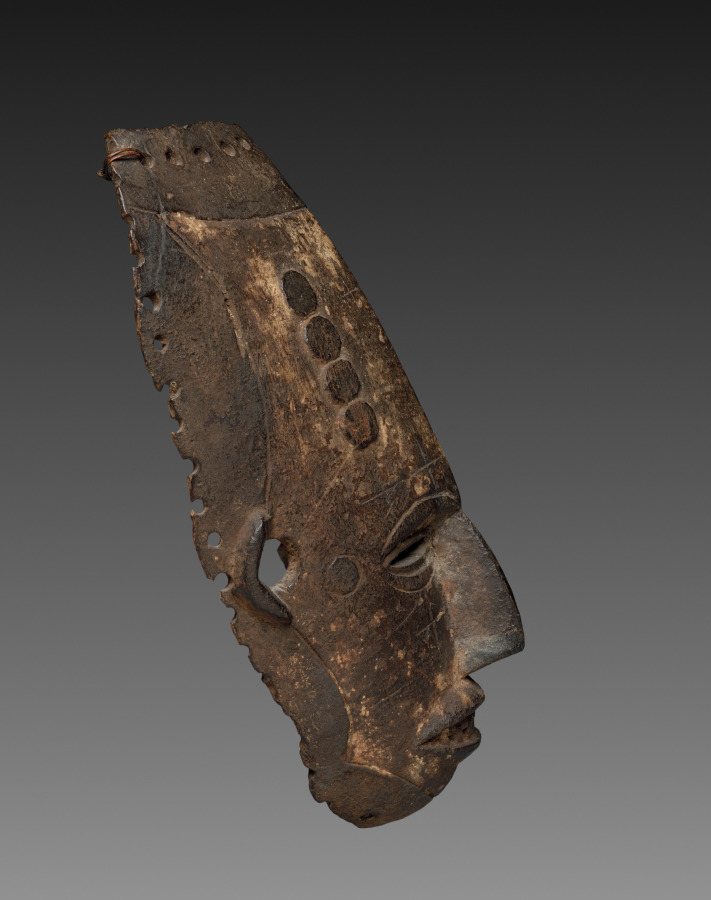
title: Face Mask (Agboho mmuo)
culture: Africa, West Africa, Nigeria, Igbo-style maker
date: possibly early 1900s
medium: Wood, pigment, plant fiber, and cotton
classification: Mask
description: This small face mask would have been complemented by a separate, elaborate superstructure covered with cotton cloth. Though always worn by a man, the image glorifies youthful female beauty. Derived from chalky clay, the white coloration of the face refers to ancestral spirits whose powers the mask evokes. The masks dance in festivals that generally celebrate the dead but also appear at funerals to escort the deceased to the land of the ancestors.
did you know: Though always worn by a man, the imagery of this mask celebrates youthful female beauty.